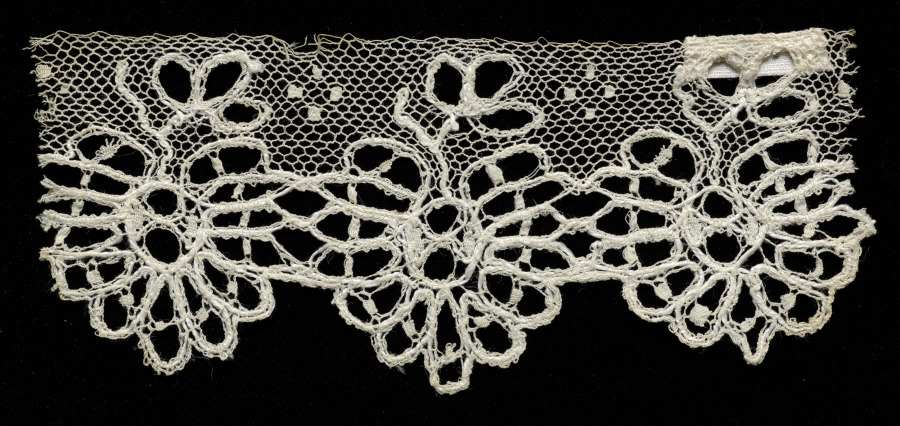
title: Lace Edging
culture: Spain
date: 1700s–1800s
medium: Bobbin lace (blonde lace)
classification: Lace